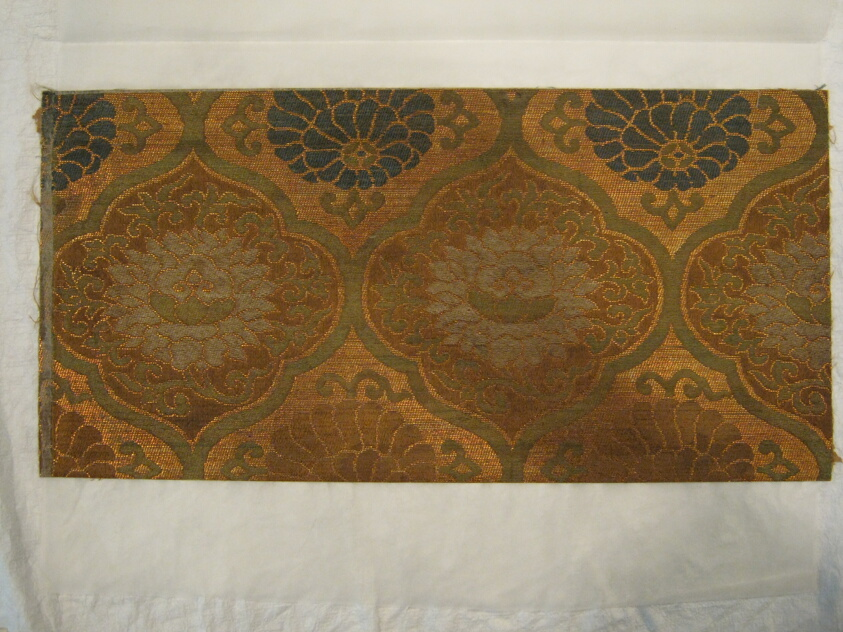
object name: Textile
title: Fragment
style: edo (japanese period)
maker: Japan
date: Edo period (1615–1868), 1750–1800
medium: Plain compound satin, silk and gilt paper; 2 strips to m.m.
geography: Japan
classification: textile; weaving